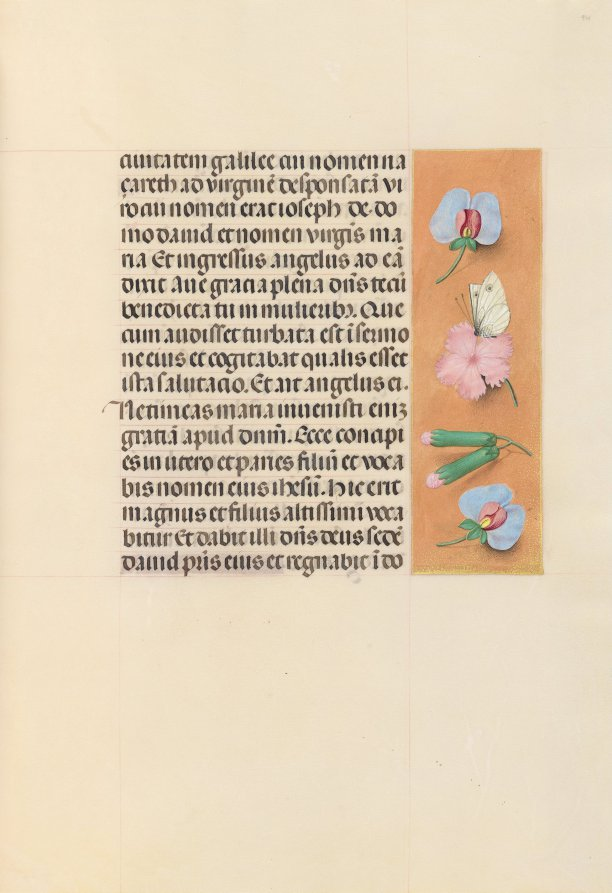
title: Hours of Queen Isabella the Catholic, Queen of Spain: Fol. 94r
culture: Flanders, Ghent and Bruges, late 15th century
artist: Master of the First Prayerbook of Maximillian (Flemish, c. 1444–1519)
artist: and Associates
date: c. 1500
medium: ink, tempera, and gold on vellum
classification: Bound Volume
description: This manuscript was illuminated by a circle of at least five highly organized manuscript painters active in the Flemish cities of Ghent and Bruges. The principal illuminator was Alexander Bening, who painted the majority of the book's miniatures. Manuscripts produced by this circle of artists are renowned for the decoration of their borders, which typically feature a rich variety of realistically-painted flowers, birds, and butterflies. This prayer book, called a book of hours, was intended not for a cleric, but for the private devotions of a lay person-in this case, Isabella the Catholic, Queen of Spain (1451-1504). Isabella's coat of arms embellishes the book's frontispiece. It is unlikely that the book was commissioned by the Queen herself; rather, she probably received it as a diplomatic gift from someone courting her patronage, perhaps Cardinal Francisco Jimenez de Cisneros. A Franciscan friar, Jimenez was dependent upon Isabella for his advancement, first to the post of Queen's confessor in 1492, and then to Archbishop of Toledo in 1495.